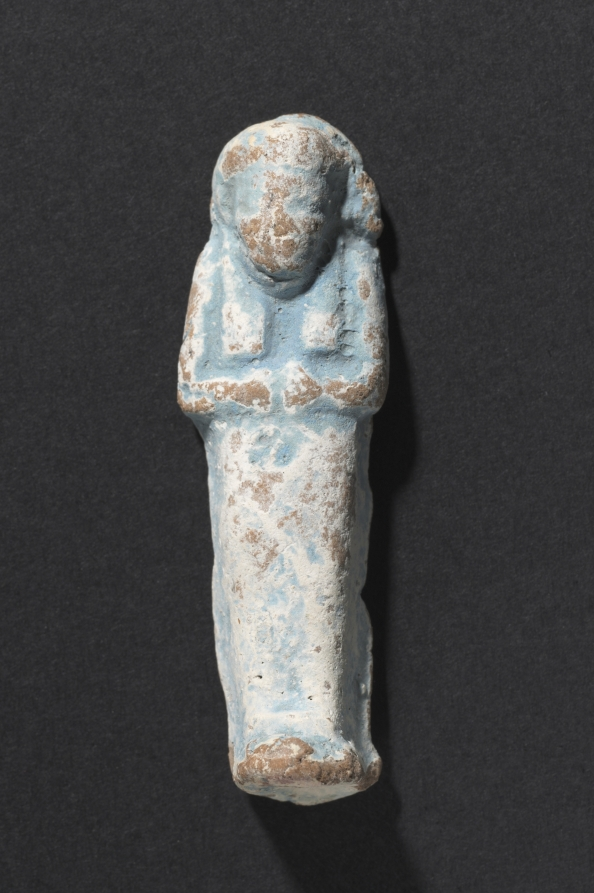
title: Shawabty of Ditamenpaankh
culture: Egypt, Late period (715–332 BCE), Dynasty 25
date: 715–656 BCE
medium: terracotta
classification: Funerary Equipment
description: High demand for shawabtys in the Late Period, a time when as many as 400 or more shawabtys were placed in the tomb with the deceased, gave rise to a specialized container for storing them: the shawabty box. This example is inscribed for the lady of the house, Ditamenpaankh, and was probably one of a pair originally made for her. The single-masted boat on the box's lid is perhaps an allusion to the pilgrimage of the deceased to the holy city of Abydos, the cult city of Osiris, king of the dead. The shawabtys inside are crude, mass-produced examples cast in an open mold. Made of terracotta, their blue paint imitates more costly shawabtys made of faience. As for the shawabty spell, it has been removed from its traditional location on the shawabty's front and relocated onto the sides of box, where it needed only to be written once, thus expediting production.